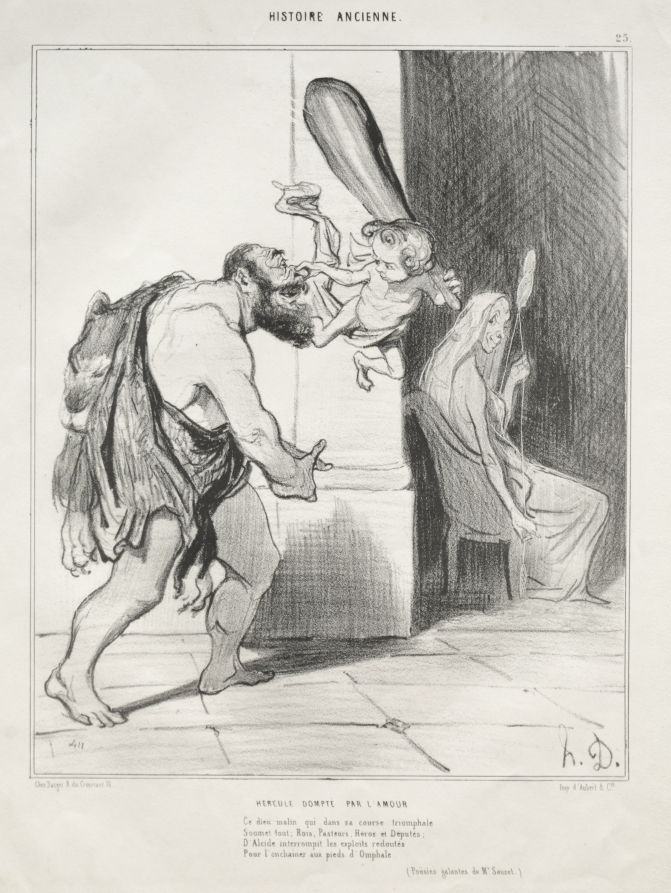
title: Hercules Tamed by Love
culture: France, 19th century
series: Ancient History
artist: Honoré Daumier (French, 1808–1879)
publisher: Aubert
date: 1842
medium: lithograph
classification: Print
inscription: Above image, printed: HISTOIRE ANCIENNE. / 25 ; below image, printed: "HERCULE DOMPTÉ PAR L'AMOUR. / Ce dieu malin qui dans sa course triomphale / Soumet tout; Rois, Pasteurs, Héros et Députés; / D'Alcide interrompit les exploits redoutés / Pour l'enchaîner aux pieds d'Omphale. / (Poësies galantes de Mr. Sauzet.)"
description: This print was published in Le Charivari (September 18, 1842) as plate 25 from the series Ancient History.